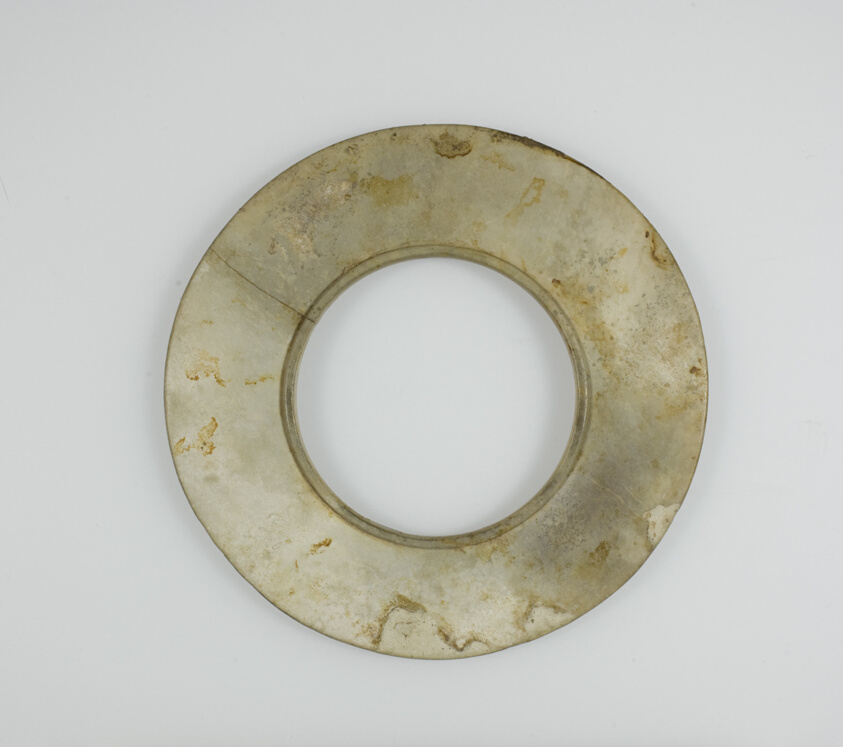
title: Disc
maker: China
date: Shang dynasty (c. 1600–1046 B.C.)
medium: Jade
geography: China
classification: jade; asian art